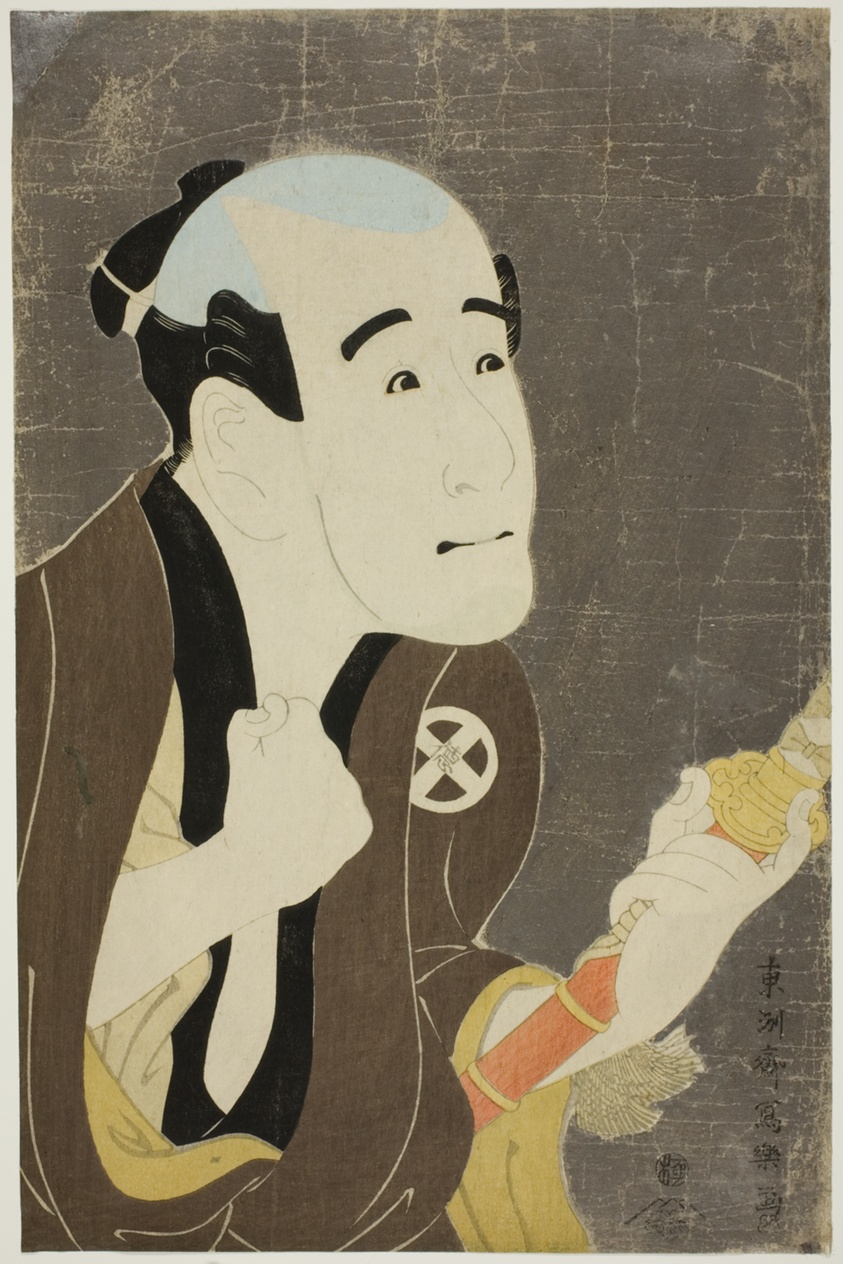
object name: Print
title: The actor Otani Tokuji I as manservant Sodesuke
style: Japanese (culture or style)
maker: Toshusai Sharaku 東洲斎 写楽; Japanese, active 1794-95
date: 1794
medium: Color woodblock print; oban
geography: Japan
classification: woodblock print; print; asian art